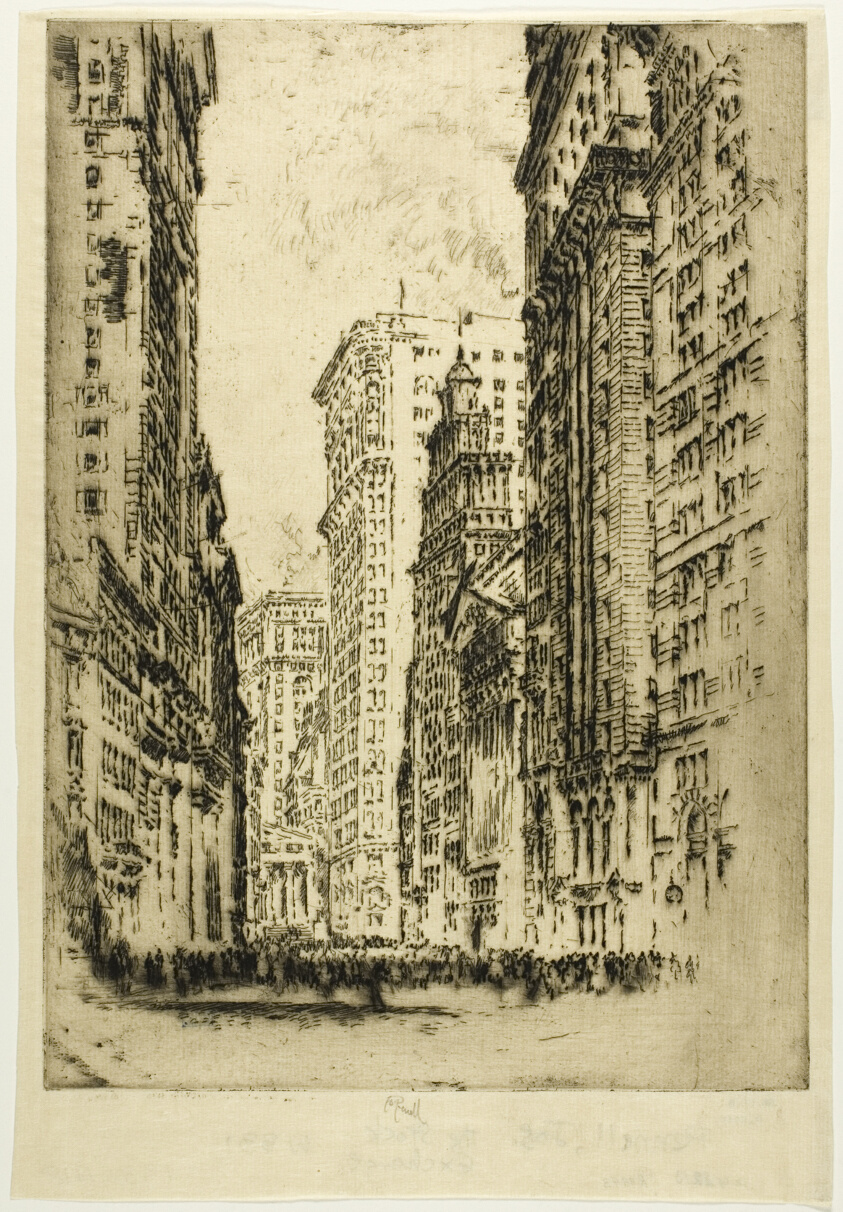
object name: Print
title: The Stock Exchange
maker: Joseph Pennell (American, 1857-1926)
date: 1904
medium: Etching on ivory laid tissue-thin paper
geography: United States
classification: etching; print; prints and drawing